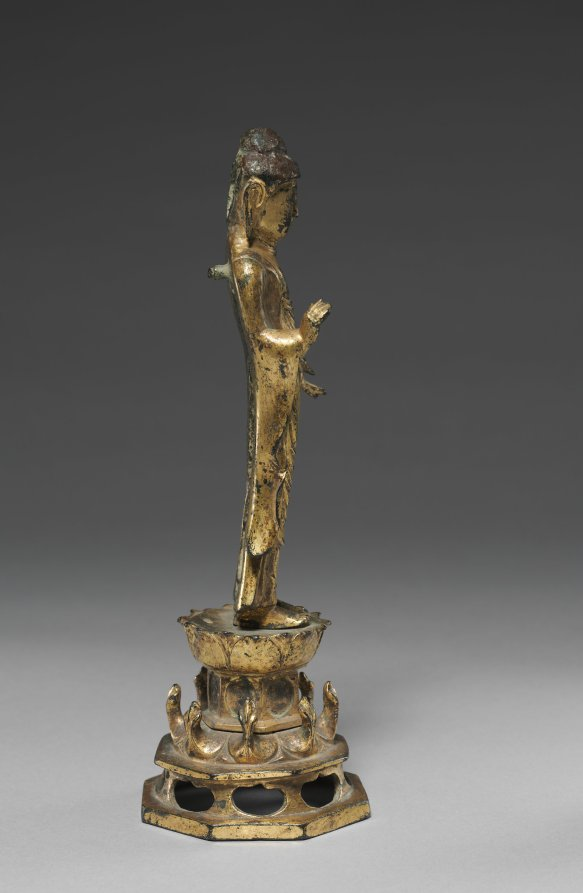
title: Statue of Amitabha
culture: Korea, Unified Silla period (676-935)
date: 800s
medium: gilt bronze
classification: Sculpture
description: This small sculpture shows Amitabha, the Buddha of the Western Paradise and the focus of the Pure Land sect of Buddhism, which was popular across East Asia, including Korea. This deity is recognizable from its right hand raised palm out in a gesture that reassures viewers to have no fear.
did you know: Small statues like this work were designed to be portable, rather than to be permanently housed in a Buddhist temple.